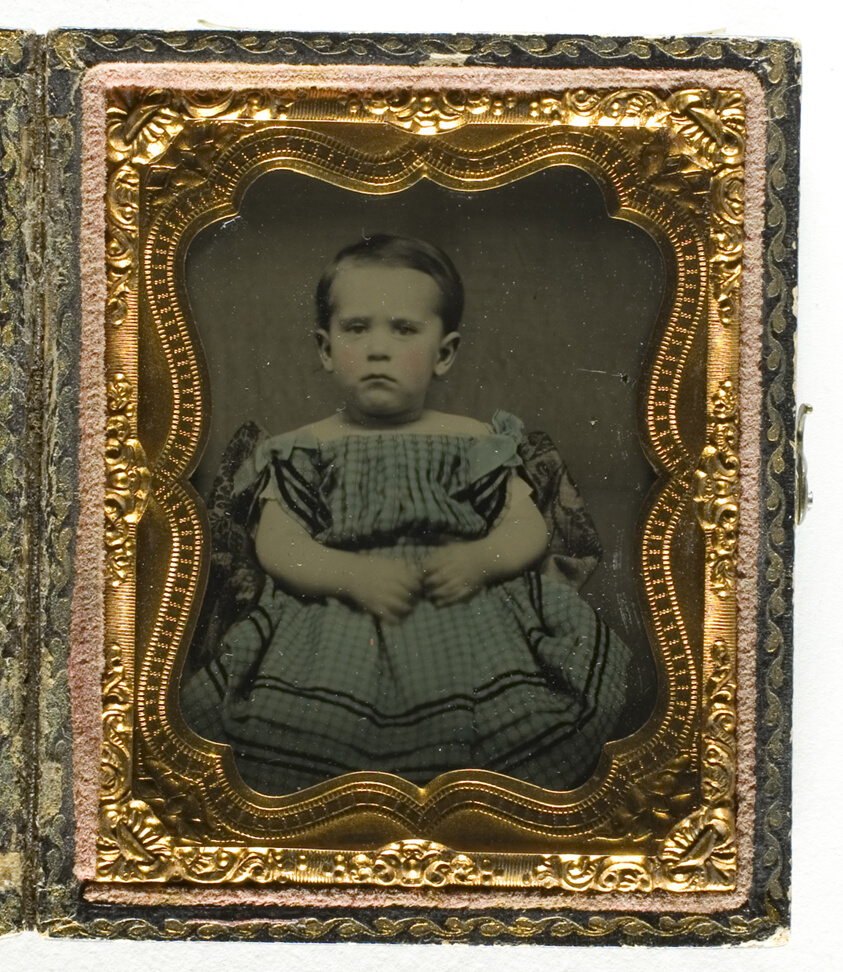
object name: Photograph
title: Untitled (portrait of a child)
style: 19th century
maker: Artist unknown; 19th century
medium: Ambrotype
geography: Unknown Place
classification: ambrotype; photographic process; photography; photograph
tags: Collected by Hugh Edwards, portraits: female subject, photography, portraits